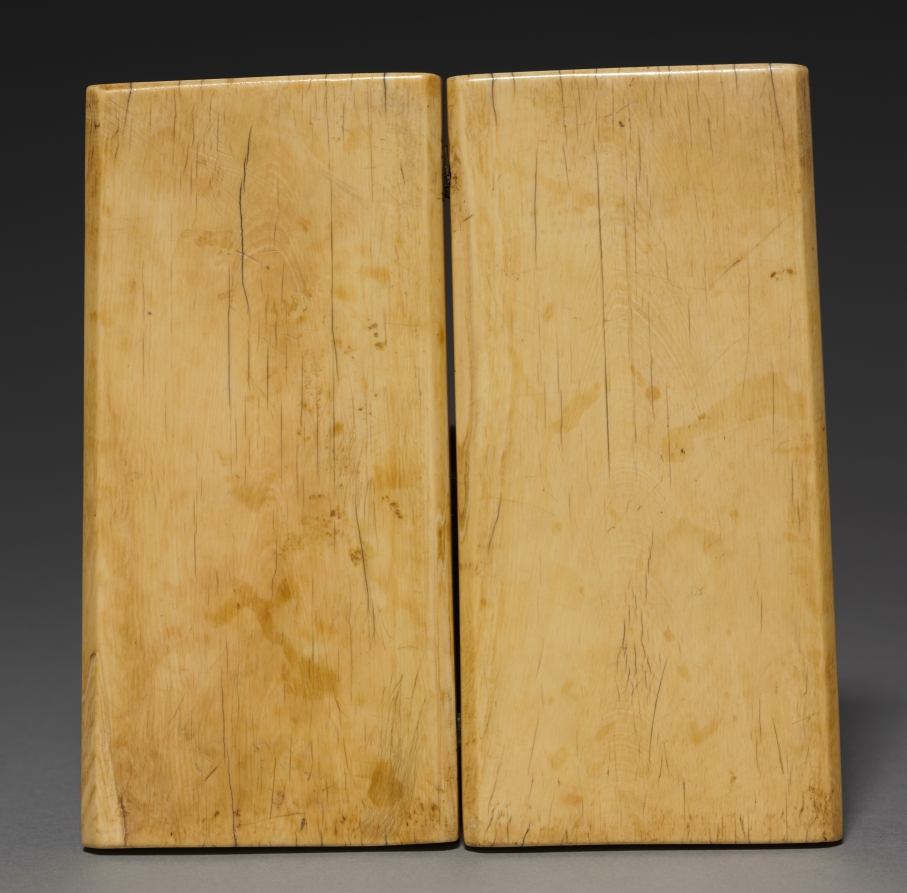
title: Diptych: Scenes from the Passion and Afterlife of Christ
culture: France, Gothic period, 14th century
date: c. 1330–1350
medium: ivory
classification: Ivory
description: The four scenes represented on this ivory diptych are Christ’s Flagellation and Crucifixion on the left panel and Christ’s Resurrection and Appearance to Mary Magdalene (Noli me tangere, or "Do not touch me"). Ivory diptychs like this one illustrating pivotal moments in the story of Christ’s Passion and resurrection served as powerful tools in the devotional practices of elite members of society during the later Middle Ages.